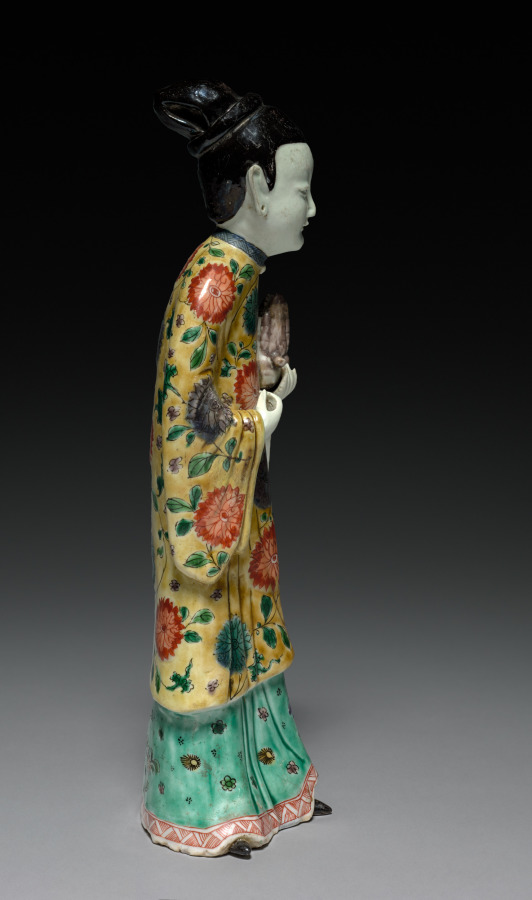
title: Court Lady Holding a Sheng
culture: China, Jiangxi province, Jingdezhen kilns, Qing dynasty (1644-1911), Kangxi reign (1662-1722)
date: 1662–1722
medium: porcelain with famille verte overglaze enamel decoration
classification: Ceramic